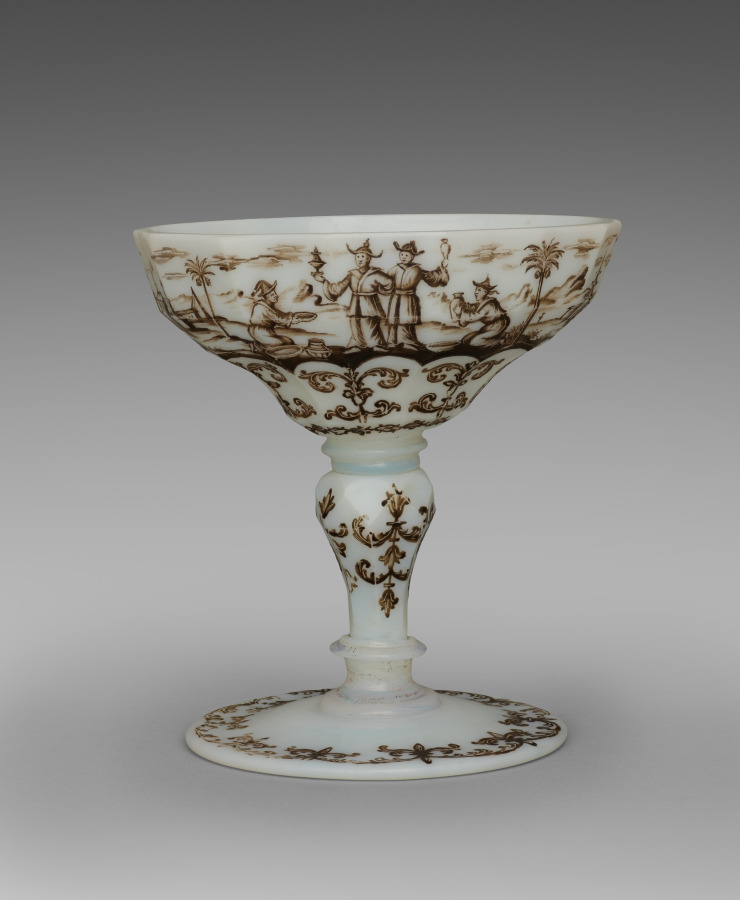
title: Cup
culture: Bohemia, 18th century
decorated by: Ignaz Preissler (Bohemian, 1676–1741)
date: c. 1735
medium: Opal glass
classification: Glass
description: This cup may have functioned as a vessel for an alcoholic beverage or as a container for food such as candies or pastries. Ignaz Preissler’s specialty was a technique known as Schwarzlot (“black lead” in German), in which a design was painted with black enamel and then fine details were scratched out with a needle. Preissler’s clients were primarily aristocrats who commissioned vessels as gifts or commemorative items and for whom the chinoiseriedecoration (imaginary European interpretations of Asian cultures), seen here, was fashionable.